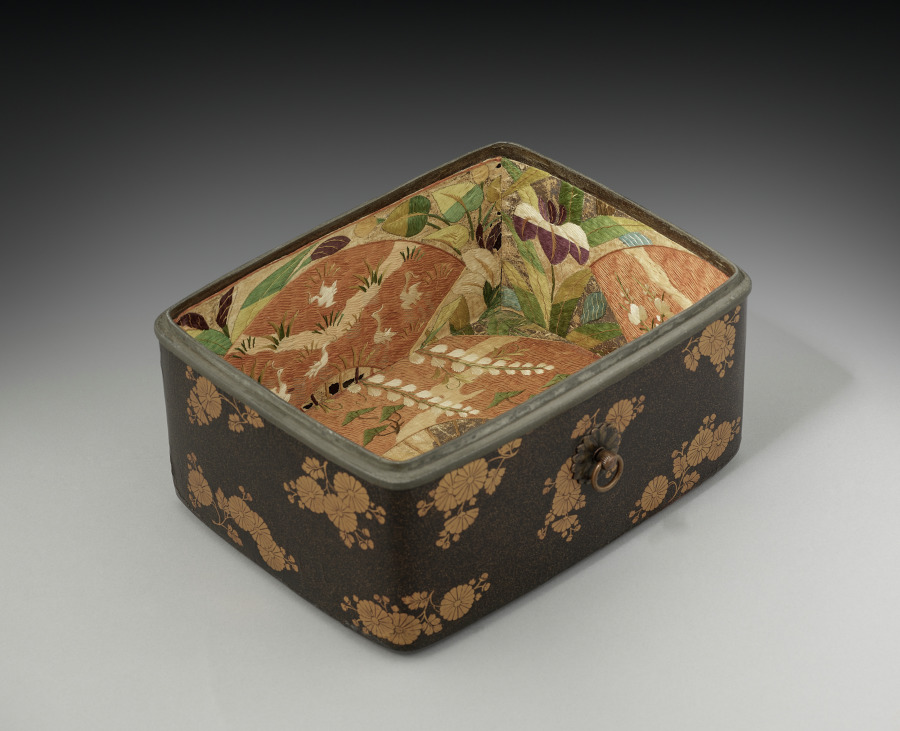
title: Cosmetics Box with Chrysanthemums (base)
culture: Japan, Kamakura period (1185–1333)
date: early 1300s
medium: lacquer on wood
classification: Lacquer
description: In China, the chrysanthemum was historically appreciated for its association with the Double Nine Festival and the reclusive life of the poet Tao Yuanming (AD 365-427). In Japan, the 16-petaled chrysanthemum came to symbolize the Japanese imperial family after Emperor Gotoba (1180-1239) chose the motif as his personal emblem, having it applied to his sword and everyday utensils. This box proves that the flower also appeared on lacquer wares as early as the Kamakura period.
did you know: In Japanese, this type of small box is called a tebako, literally a hand box, and was typically part of a cosmetics set.